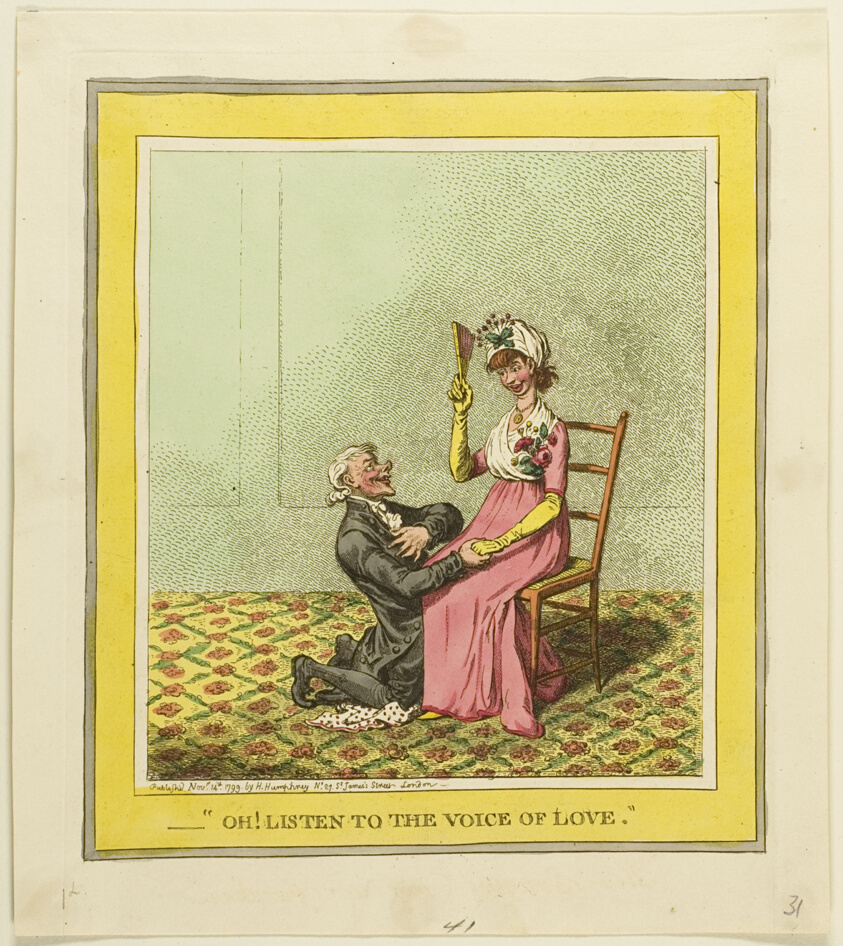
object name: Print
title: Oh! Listen to the Voice of Love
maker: James Gillray (English, 1756-1815); published by Hannah Humphrey (English, c. 1745-1818)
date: published November 14, 1799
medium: Hand-colored etching on paper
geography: England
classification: etching; print; prints and drawing